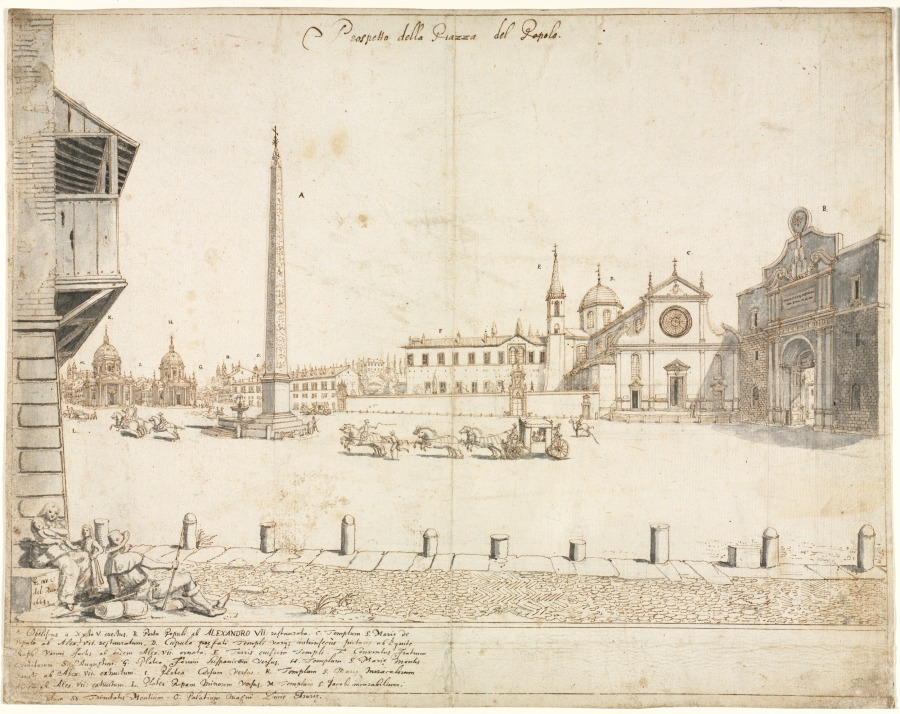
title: Eighteen Views of Rome: The Piazza del Popolo (recto); Sketch for San Giovanni in Laterano (verso)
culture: Flanders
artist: Lievin Cruyl (Flemish, c. 1640-c. 1720)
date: 1664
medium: pen and brown ink and brush and gray wash over stylus and graphite; framing lines in brown ink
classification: Drawing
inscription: recto: signed, lower left, in brown ink: [artist monogram: CL]. INV. et / del: Romæ / 1664. ; by artist, upper center, in brown ink: Prospetto della Piazza del Popolo. ; by artist, throughout composition, in brown ink: [the letters A-O] ; by artist, lower left, in brown ink: A. Obeliscus a Xysto V. erectus. B. Porta Populi ab ALEXANDRO VÎÎ: restaurata. C. Templum S. Maria de / Populo ab Alex. vii. restauratum. D. Cupula praefati Templi varijs intrinsecùs picturis ab Equite / Raph: Vanni factis ab eodem Alex. vii. ornata. E.Turris eiusdem Templi. F. Conventus Fratrum / Eremitarum S. Augustini. G. Platea Forum hispanicum Versus. H. Templum S. Mariæ Montis / Sancti ab Alex: vii. extructum. I. Platea Cursum Versus. K. Templum S. Mariæ Miraculorum / [illegible]dem ab Alex. vii: extructum. L. Platea Ripam Minorem Versus. M. Templum S. Jacobi incurabilium. / [N. Tem]plum SS. Trinitatis Montium. O. Palatium Magni Ducis Etruriæ. ; lower center, in graphite: L[illegible] ; lower right, in graphite: 2 verso: upper right, in brown ink: [2?]S46 [partially masked] ; ON PAPER STRIP MOUNTED TO PERIMETER, lower left, in graphite: A20969 ; lower right, in graphite: E. 7